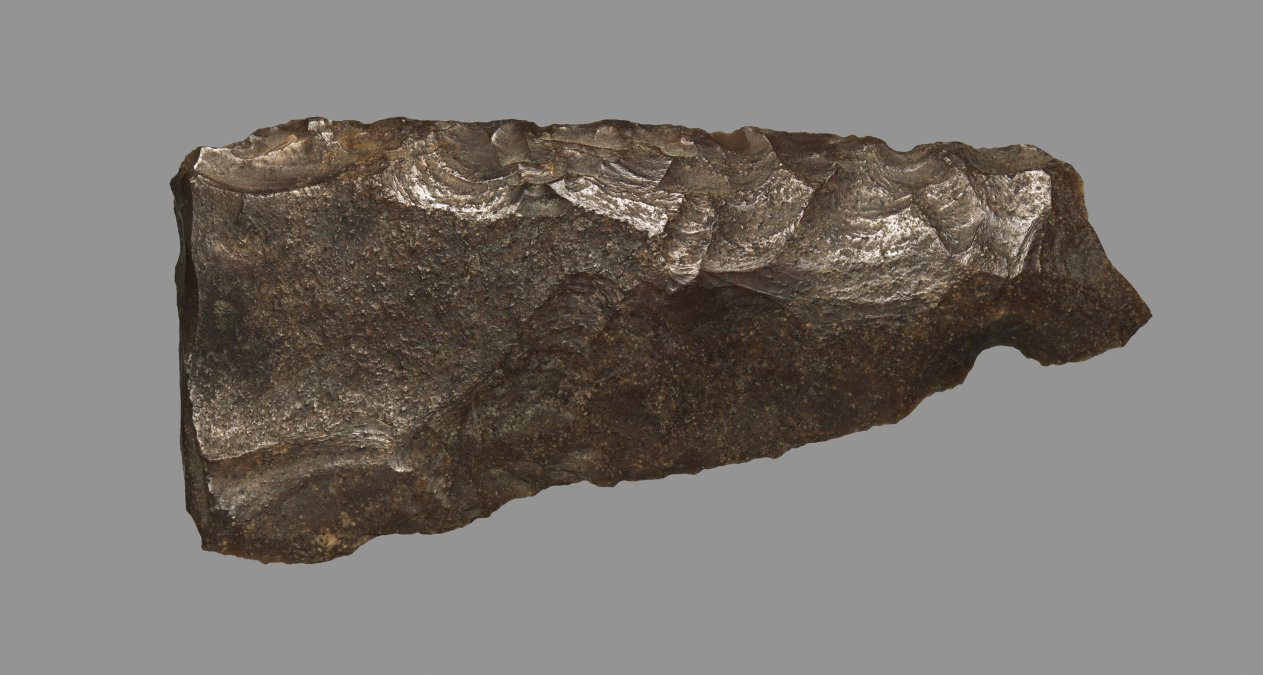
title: Hand Axe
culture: Egypt, Haraga, excavated in 1914, Predynastic (5000–2950 BCE)–Old Kingdom (2647–2124 BCE)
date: 4400–2100 BCE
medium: dark-brown-colored flint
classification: Implements